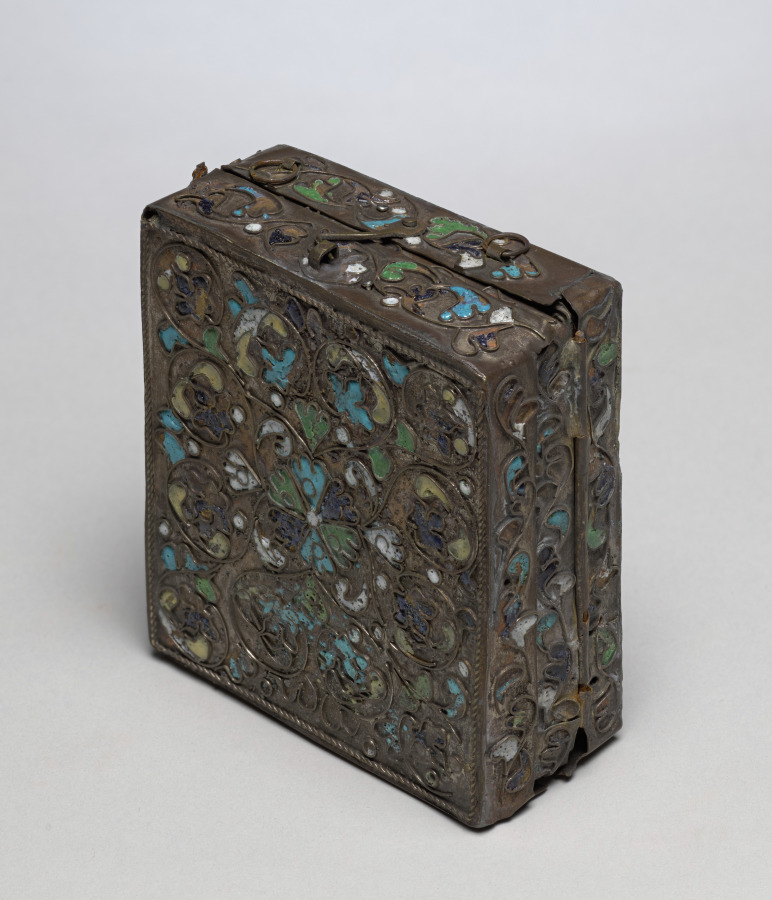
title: Triptych with Christ, the Virgin, and St. John the Evangelist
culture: Russia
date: 1800s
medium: pigment on wood, in cloisonné enamelled insert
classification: Painting